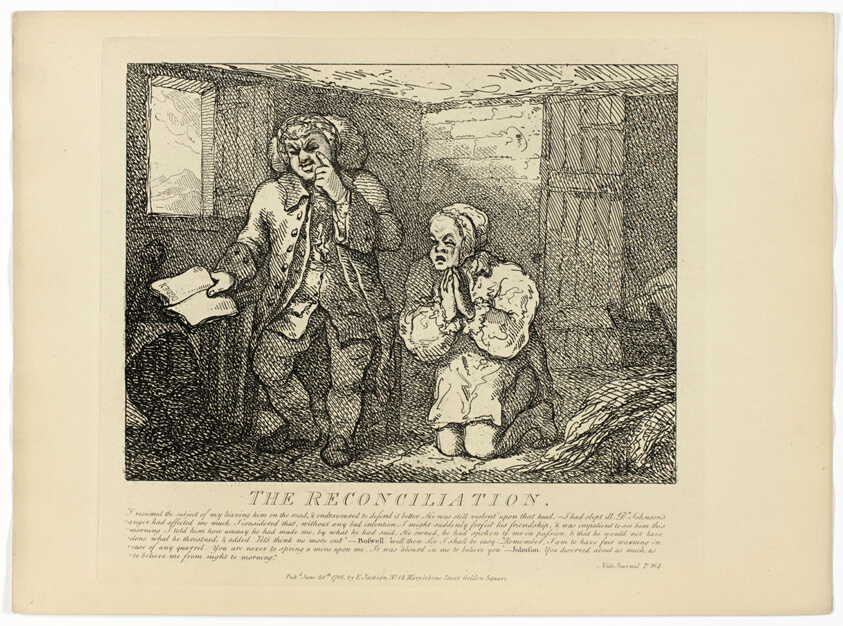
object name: Print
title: The Reconciliation, from Boswell's Tour of the Hebrides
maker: Thomas Rowlandson (English, 1756-1827)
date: 1786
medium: Etching on paper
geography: England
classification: etching; print; prints and drawing